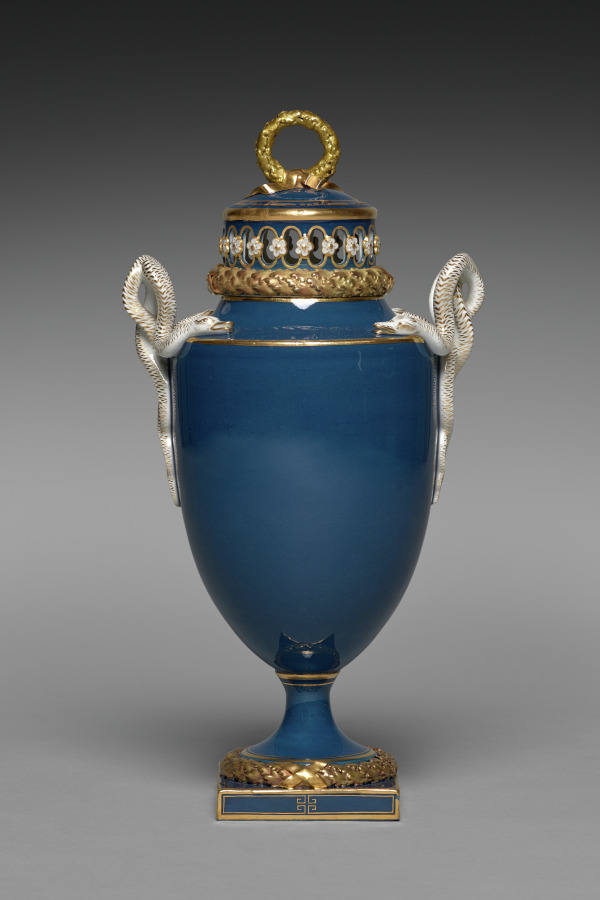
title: Covered Vase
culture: Germany, 19th century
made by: Meissen Porcelain Factory (German, est. c. 1710)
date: 1881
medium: porcelain with pâte-sur-pâte decoration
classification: Ceramic